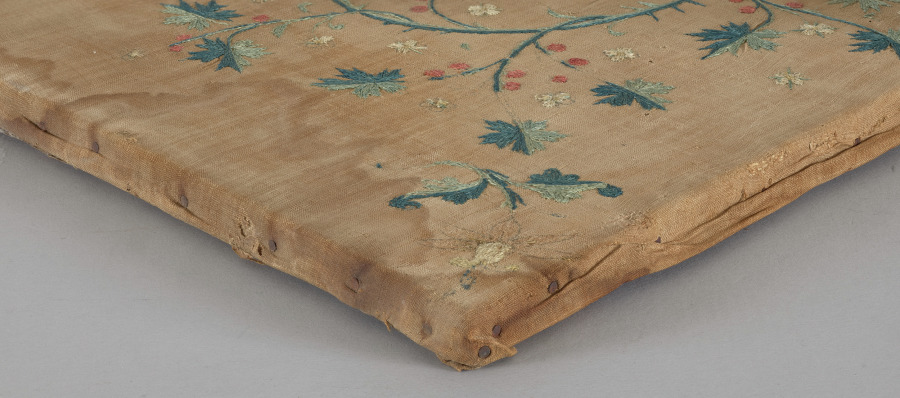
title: Christ Gathering Roses, Centerpiece of an Altar Cloth(?)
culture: Germany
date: early to mid-1400s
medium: Linen: plain weave; silk: embroidery (split stitch)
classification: Embroidery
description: The altar cloth was probably made for a southern German convent in the 15th century. While the focus on the Christ child is typical for female spirituality in the late Middle Ages, there are no comparative examples for the Christ child picking flowers. The detailed depiction of plants and flowers is of unusual quality for the embroideries of this period.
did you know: The Christ child has put aside his globe to devote himself entirely to picking flowers.